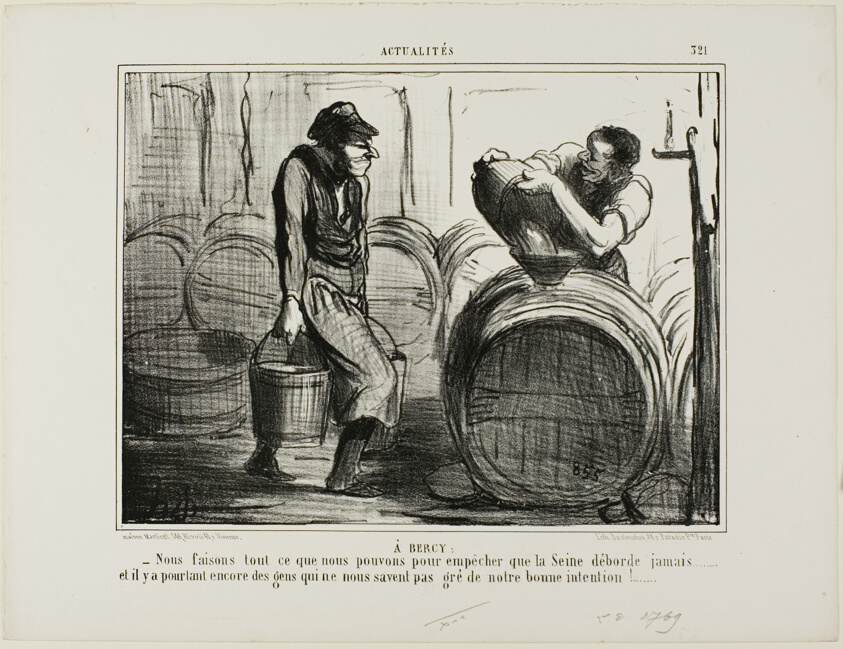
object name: Print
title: In Bercy. “We are doing everything to avoid that the river Seine overflows... and there are still people who are questioning our good intentions,” plate 321 from Actualités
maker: Honoré Victorin Daumier; French, 1808-1879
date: 1856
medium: Lithograph in black on white wove paper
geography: France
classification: lithograph; print; prints and drawing